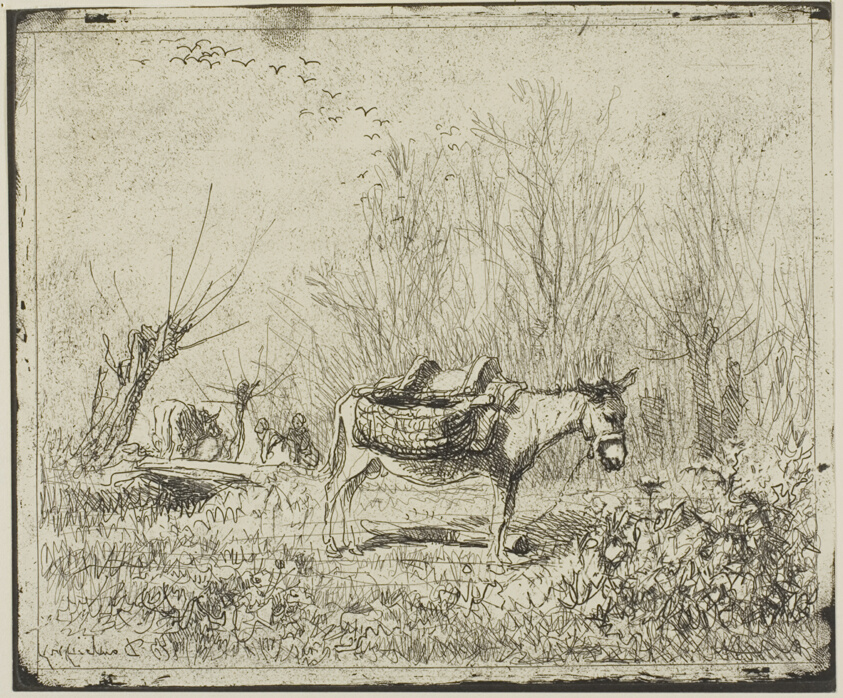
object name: Print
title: The Donkey in the Meadow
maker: Charles François Daubigny (French, 1817-1878)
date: 1862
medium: Cliché-verre on ivory photographic paper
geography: France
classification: cliché-verre; print; prints and drawing